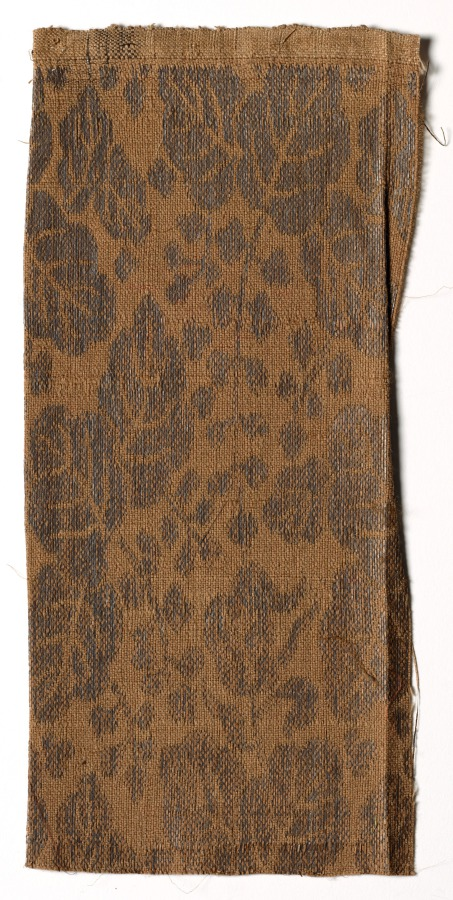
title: Textile Fragment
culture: Japan?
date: 1800s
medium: silk, metallic thread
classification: Textile